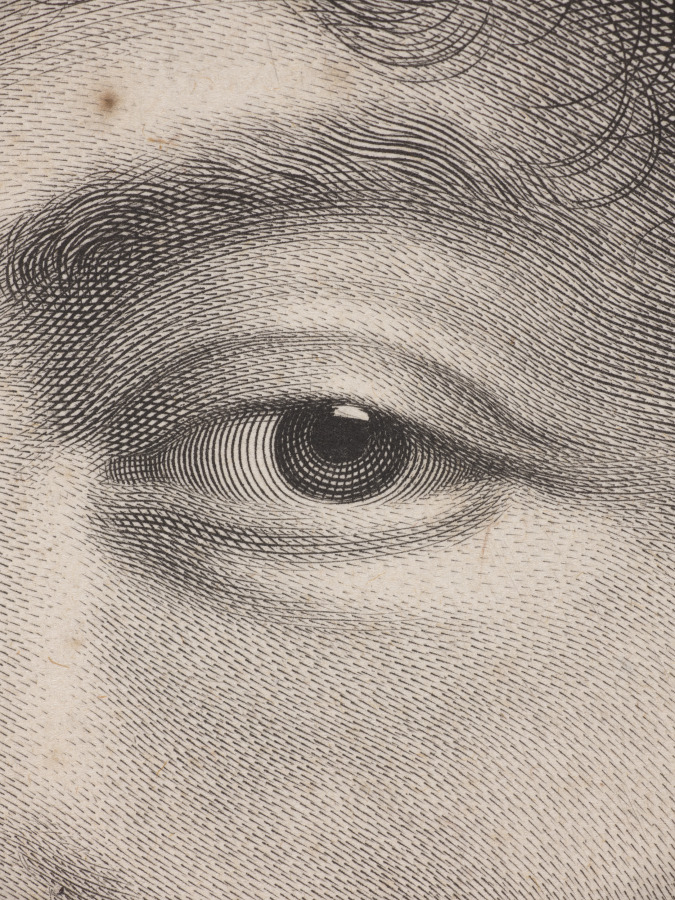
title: Louis XIV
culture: France, 17th century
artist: Robert Nanteuil (French, 1623–1678)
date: 1664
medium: engraving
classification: Print